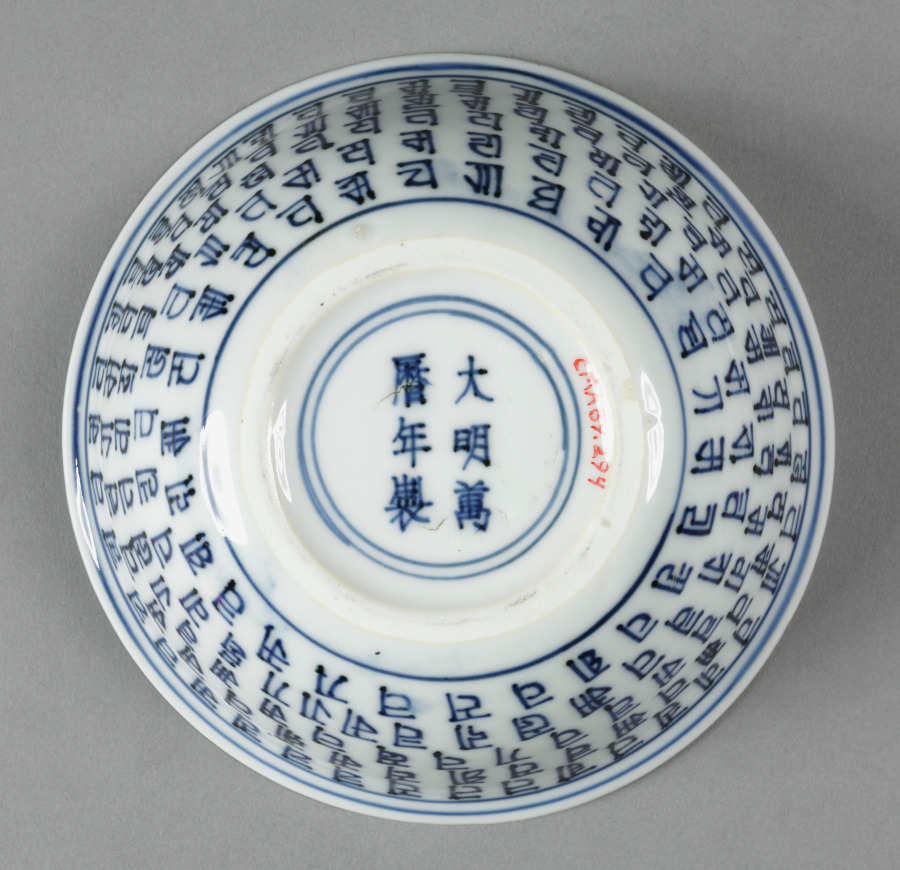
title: Bowl with Bands of Tibetan (Lança) Characters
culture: China, Jiangxi province, Jingdezhen kilns, Ming dynasty (1368-1644), Wanli mark and reign (1573-1619)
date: 1572–1620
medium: porcelain with underglaze blue decoration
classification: Ceramic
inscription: 大明萬曆年製